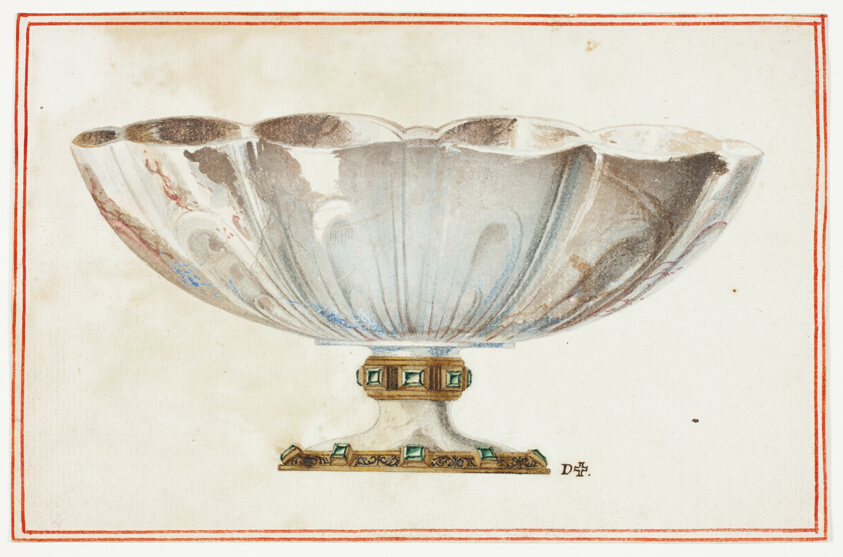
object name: Drawing and Watercolor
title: Fluted Bowl with Jewelled Base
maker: Giuseppe Grisoni (Italian, born Flanders, 1699-1769)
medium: Gouache over black chalk, on ivory laid paper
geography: Flanders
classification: gouache; watercolor; drawings (visual works); prints and drawing